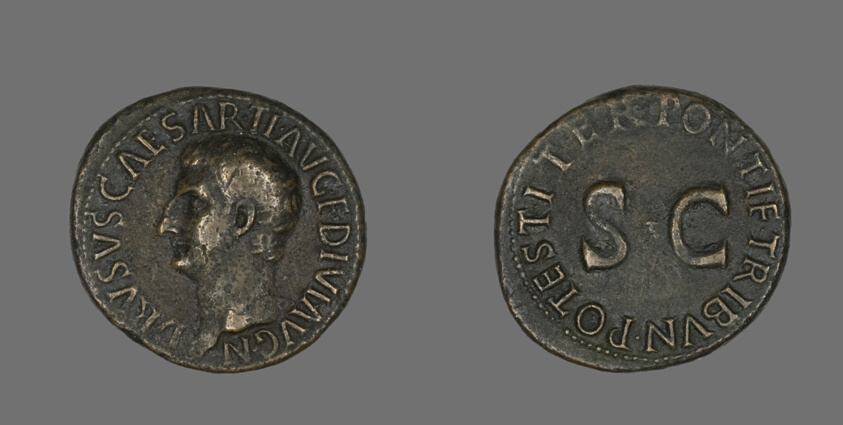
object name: Coin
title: As (Coin) Portraying Drusus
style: imperial (roman), ancient, roman (ancient, style or period)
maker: Roman, minted in Rome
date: 21-22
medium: Bronze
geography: Rome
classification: coin; ancient art